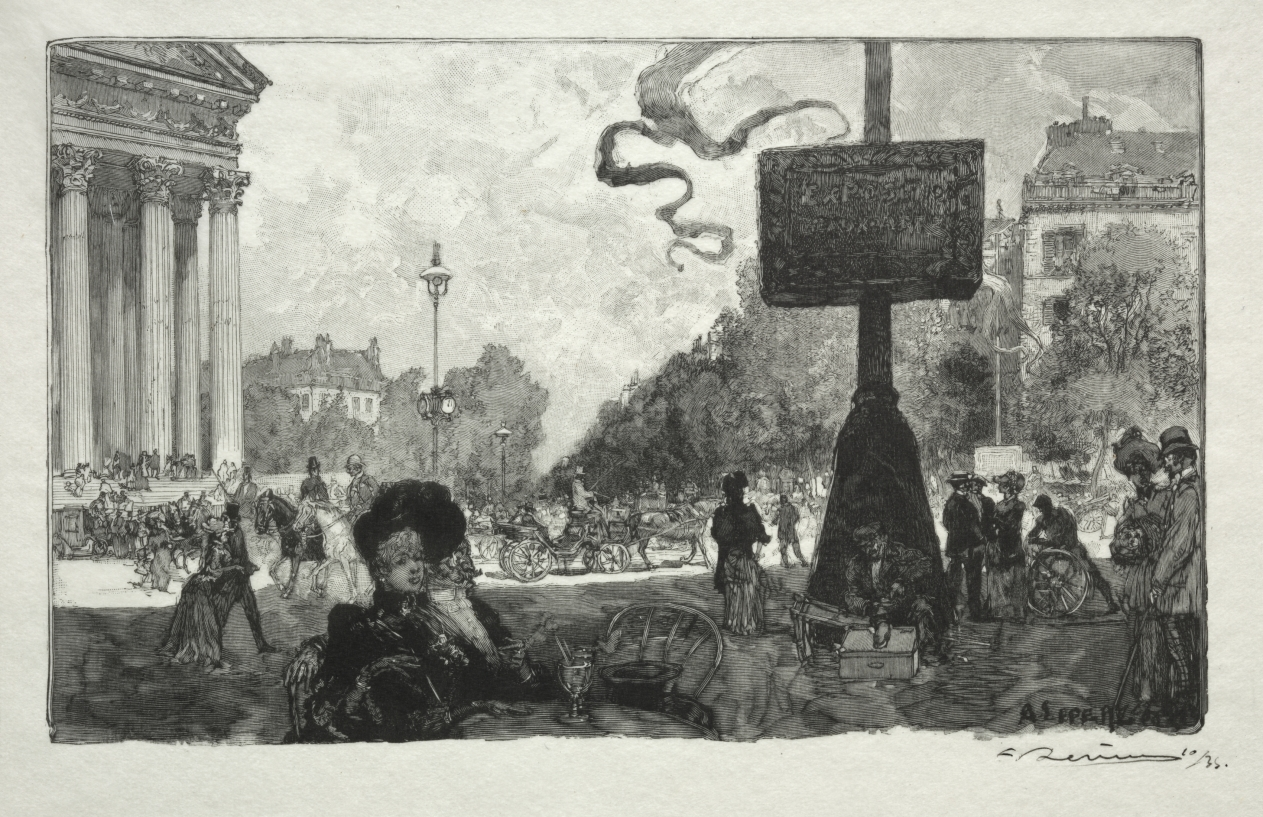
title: Coin de la Rue Royale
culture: France, 19th century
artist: Auguste Louis Lepère (French, 1849–1918)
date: 1890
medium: wood engraving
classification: Print